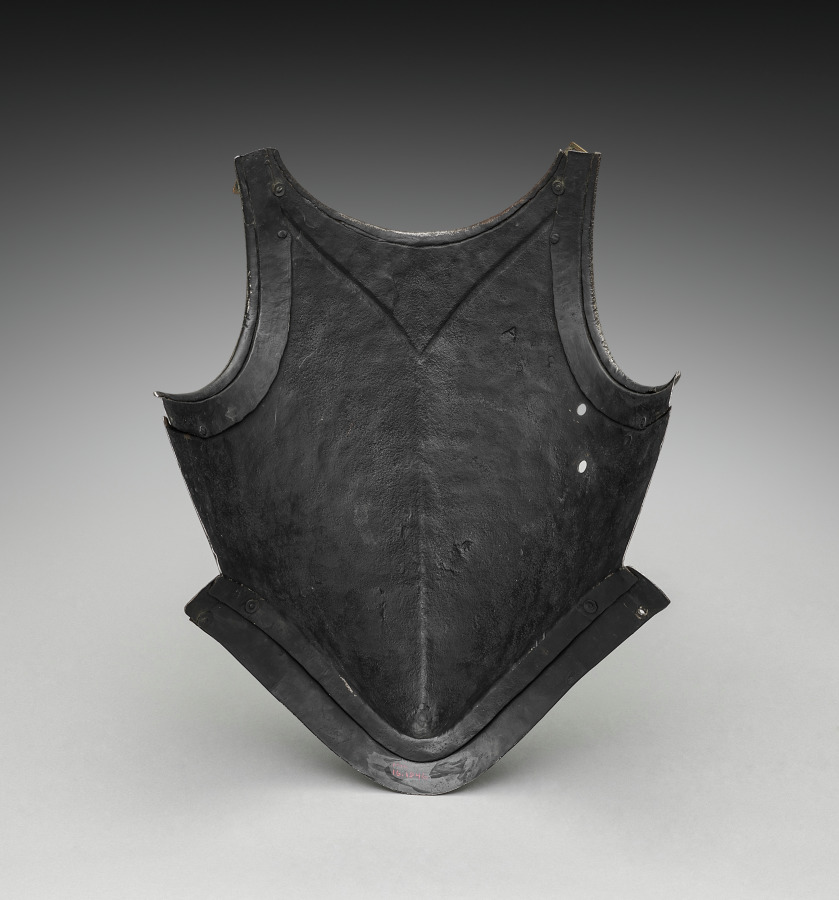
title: Breastplate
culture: Germany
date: c.1550–1570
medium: iron, steel, leather and brass rivets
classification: Arms and Armor